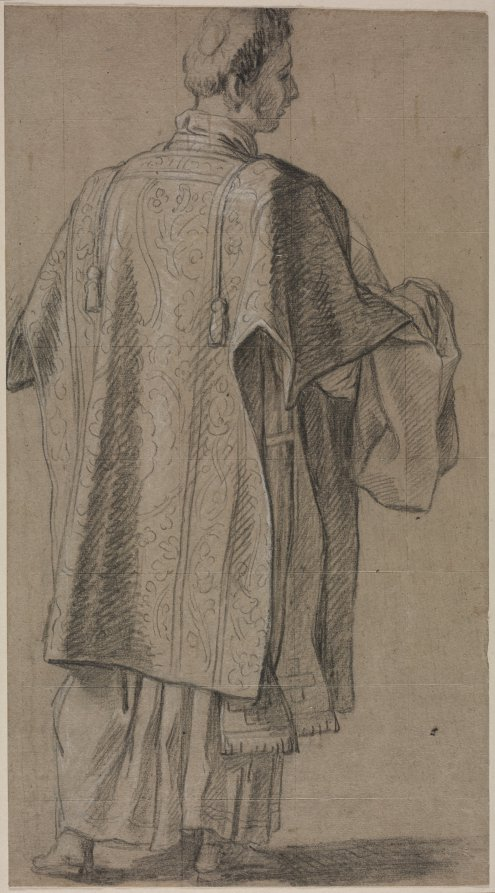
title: Ecclesiastic Seen from Behind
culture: France, 17th century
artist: Anonymous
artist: after Eustache Le Sueur (French, 1617–1655)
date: c. 1645/48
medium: black chalk heightened with white chalk, squared with stylus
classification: Drawing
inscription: VERSO, on lining, lower right, in graphite: 1 [circled] 31151RX